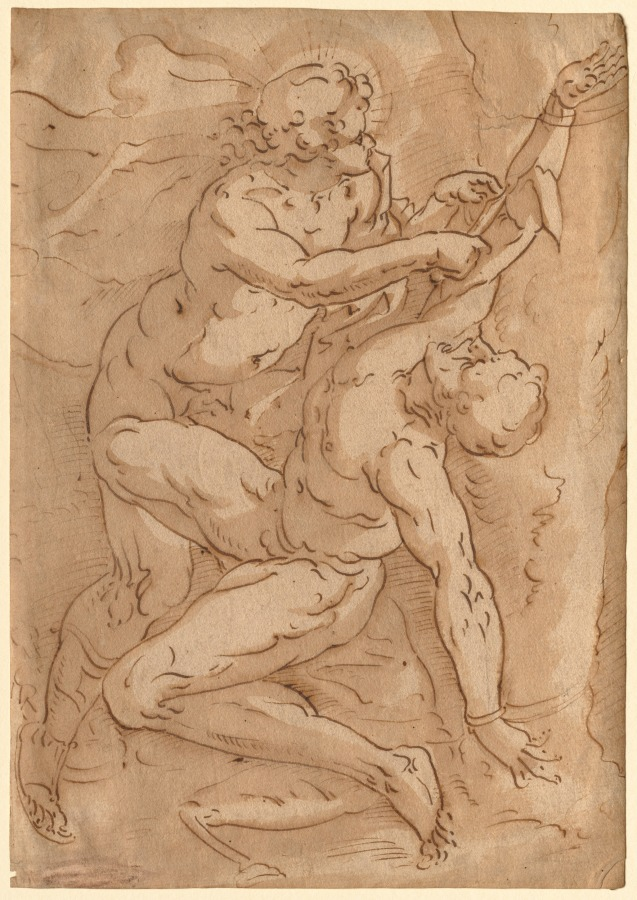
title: Apollo Flaying Marsyas (recto); Two Sketches of a Mother and Child (verso)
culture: Germany (or Netherlands), 16th century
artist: Anonymous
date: 1500s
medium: pen and brown ink and brown wash over black chalk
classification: Drawing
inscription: VERSO, upper center, in brown ink: Apollo chi scortica Marzia ; center, in graphite: 19